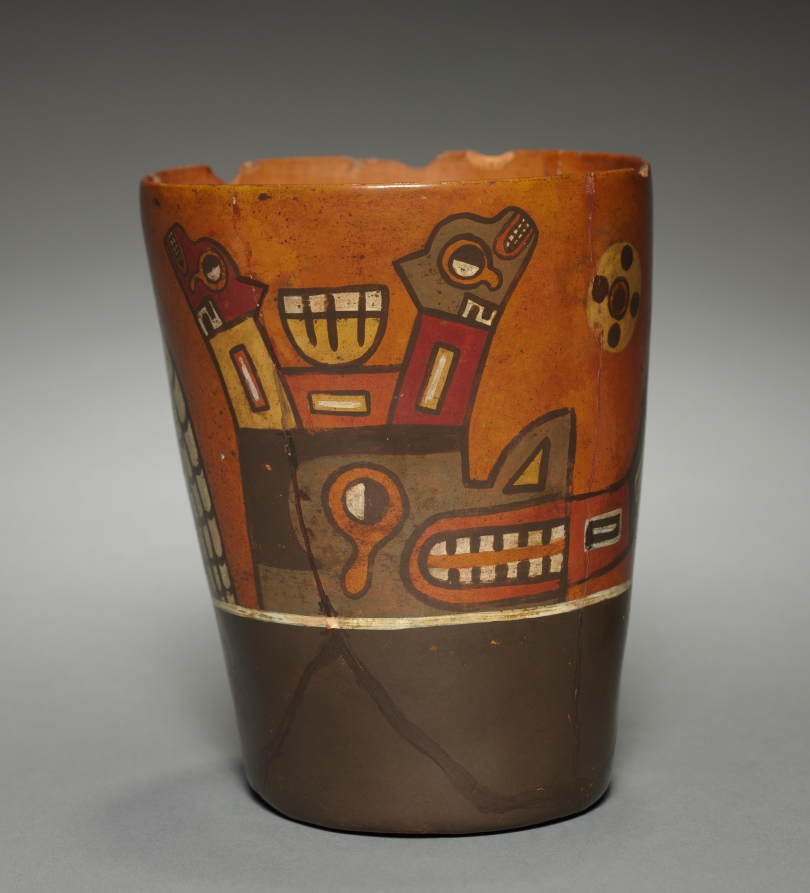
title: Kero-shaped Vessel (modern version of a Wari-style vessel)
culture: Peru, modern, 20th century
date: before 1955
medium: pottery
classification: Forgery